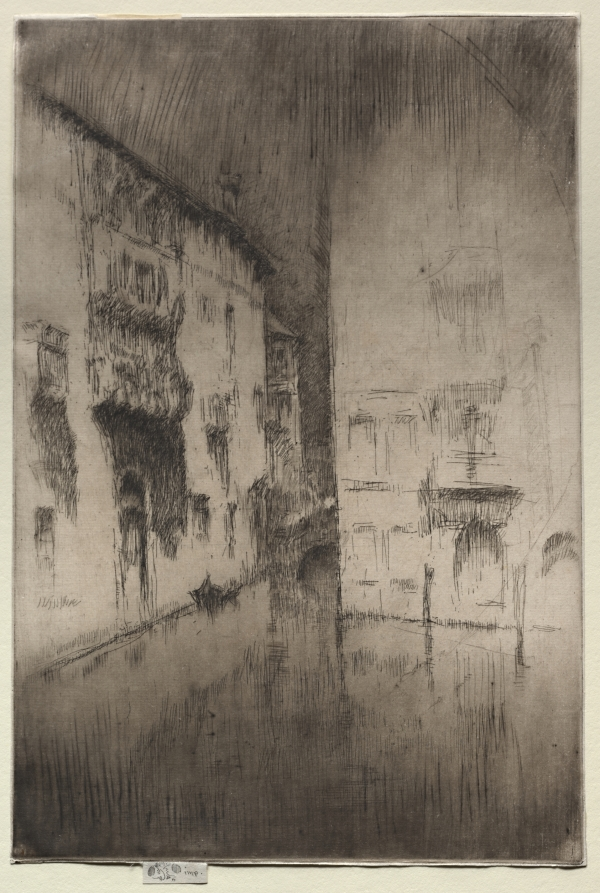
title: Nocturne: Palaces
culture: America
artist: James McNeill Whistler (American, 1834–1903)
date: 1886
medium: etching and drypoint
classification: Print